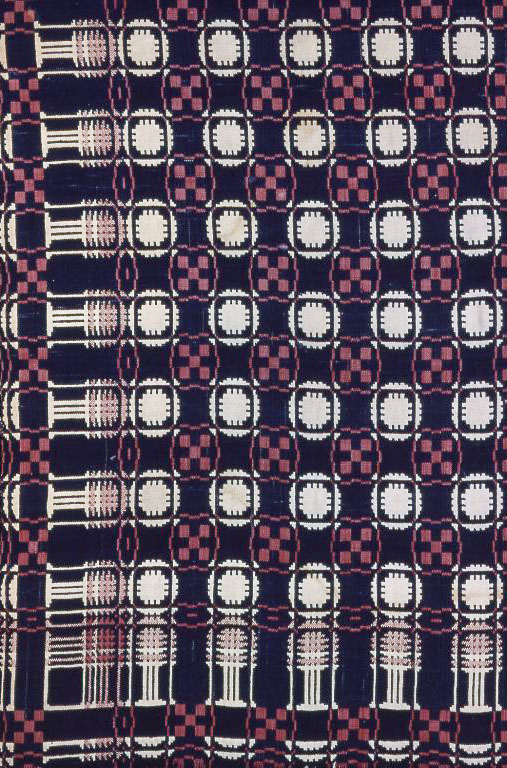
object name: Textile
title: Coverlet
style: 19th century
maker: United States, Virginia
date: c. 1825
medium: Cotton and wool, plain weave double cloth; woven on loom with Jacquard attachment; two loom widths joined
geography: Virginia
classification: weaving - coverlet; coverlet; weaving; textile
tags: geometric motif, geometric, circles, squares, coverlet